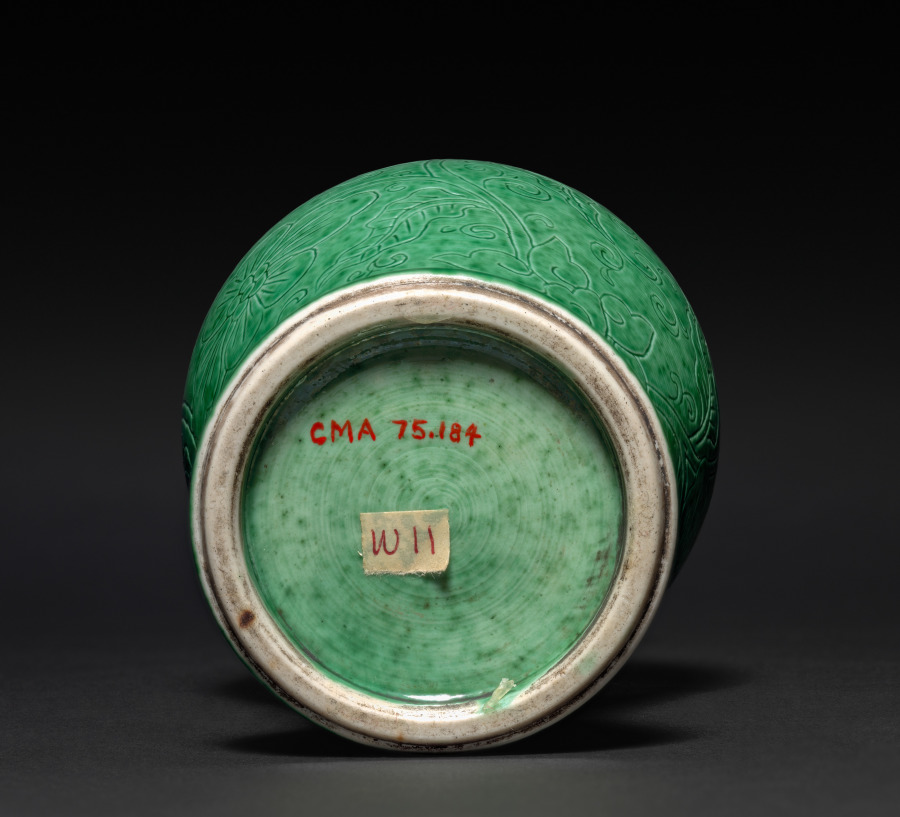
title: Vase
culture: China, Jiangxi province, Jingdezhen kilns, Qing dynasty (1644-1911), Kangxi reign (1662-1722)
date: 1662–1722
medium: glazed white porcelain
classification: Ceramic